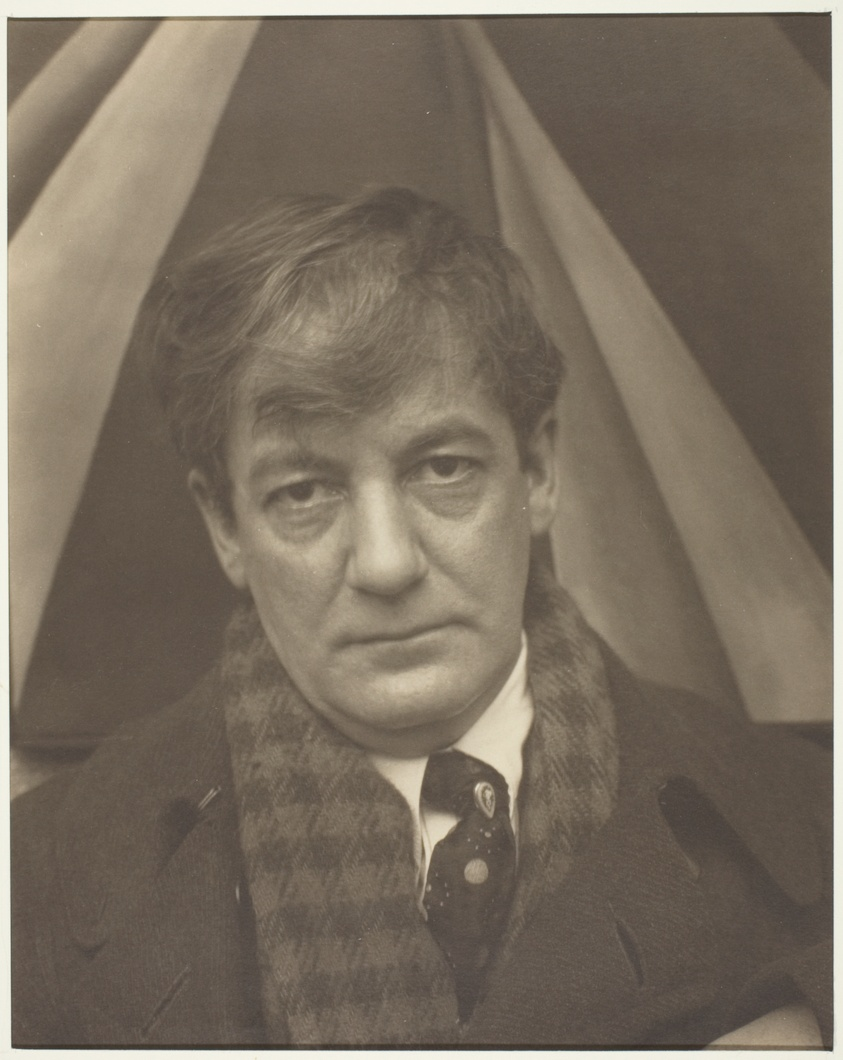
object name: Photograph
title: Sherwood Anderson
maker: Alfred Stieglitz (American, 1864–1946)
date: 1923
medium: Palladium print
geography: United States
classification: palladium print; photographic process; photography; photograph